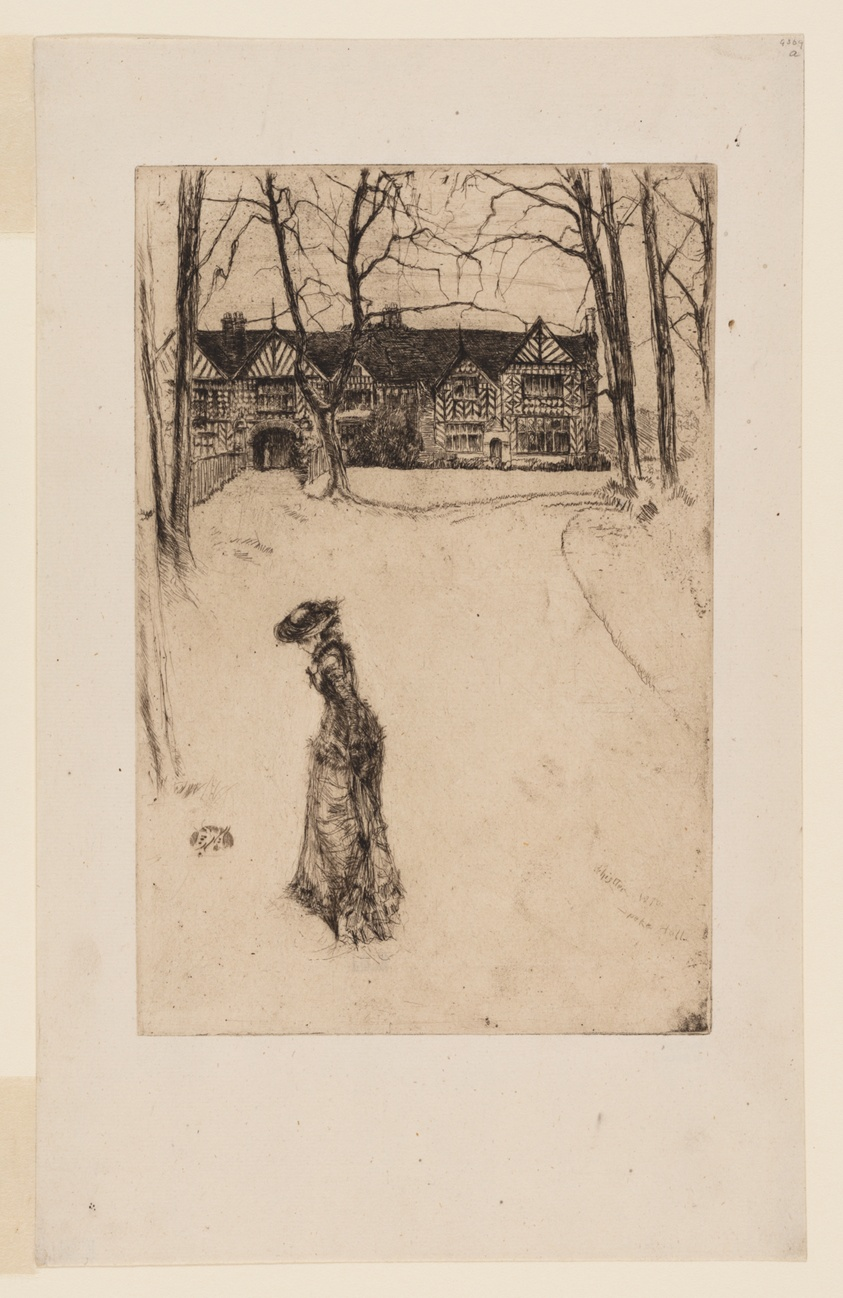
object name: Print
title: Speke Hall: The Avenue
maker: James McNeill Whistler (American, 1834-1903)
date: 1870–1878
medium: Etching and drypoint with foul biting in dark brown ink on ivory laid paper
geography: United States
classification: etching; foul biting; drypoint; print; prints and drawing; paper